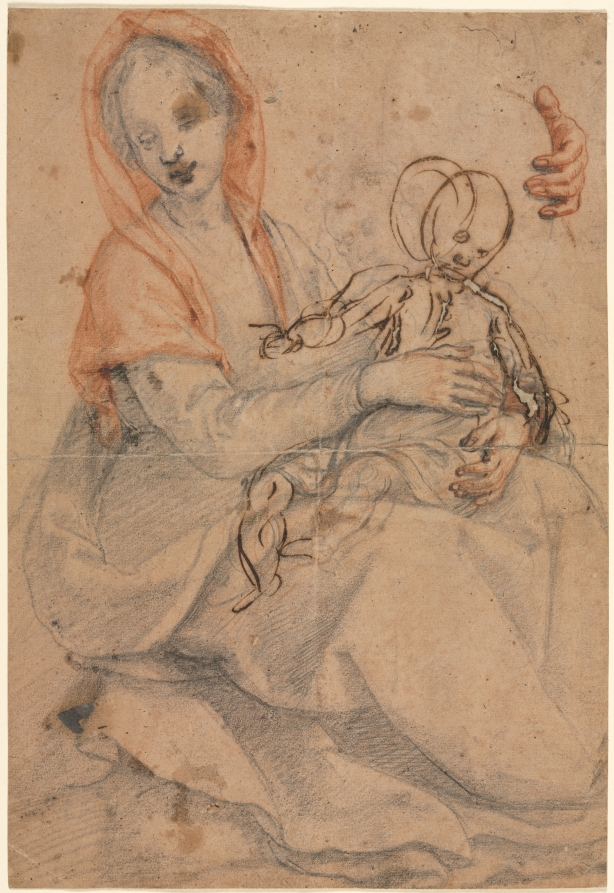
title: Madonna and Child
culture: Italy, late 15th-early 16th Century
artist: Jacopo Chimenti (Italian, c. 1554–1640)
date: c. 1600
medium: black and red chalk and pen and brown ink (iron gall)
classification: Drawing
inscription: VERSO OF SECONDARY SUPPORT, upper center, in brown ink: Coreggio ; center, in graphite(?): [illegible] ; across lower left, lower center, lower right, in graphite: Anton[io?] Aleg Deto Coregio ; lower left, in graphite: 3 ; lower center, in graphite: Empoli ; lower center, in graphite: Correggio [crossed out] ; lower right, in graphite: Mk. 1000.- ; lower right, in graphite: [I?] [7?]00 [circled]